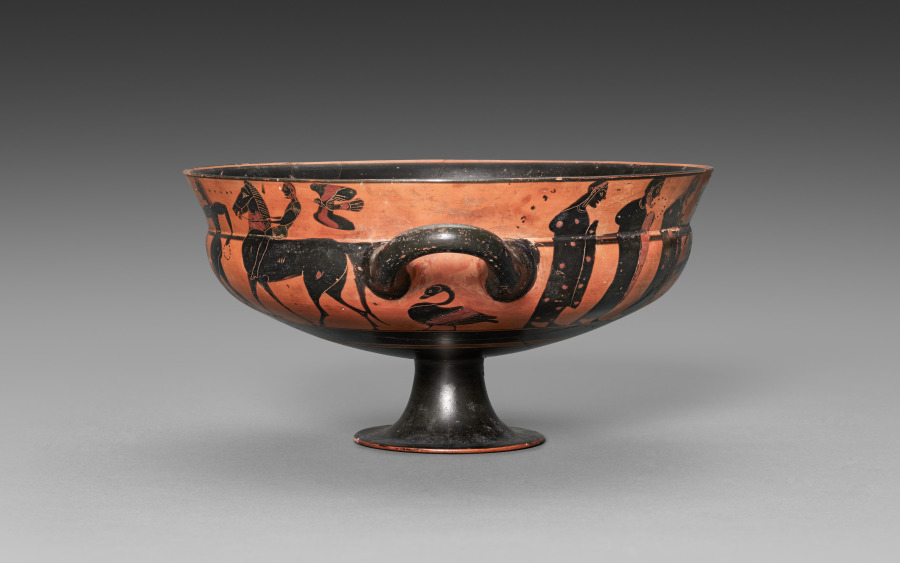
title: Siana Cup (Black-Figure Kylix [Drinking Cup]): Horseman and Warriors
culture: Greek, Attic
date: 575–550 BCE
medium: ceramic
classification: Ceramic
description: Two kneeling warriors do battle in the tondo of this large drinking cup, red blood streaming from their wounded legs. Without labels or attributes, their identities remain uncertain—perhaps Eteokles and Polyneikes, the cursed sons of Oedipus. The exterior figures are anonymous, although many are accompanied by small dots probably meant to imitate letters (for identifying inscriptions). On one side, a warrior is greeted by a nude youth holding a garland, with a horseman, a flying eagle, and several men observing. On the other, a bearded man rides a rearing horse, flanked by six draped men. Waterbirds stand beneath the handles.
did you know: Siana cups take their name from a cemetery in Rhodes where many were first found.